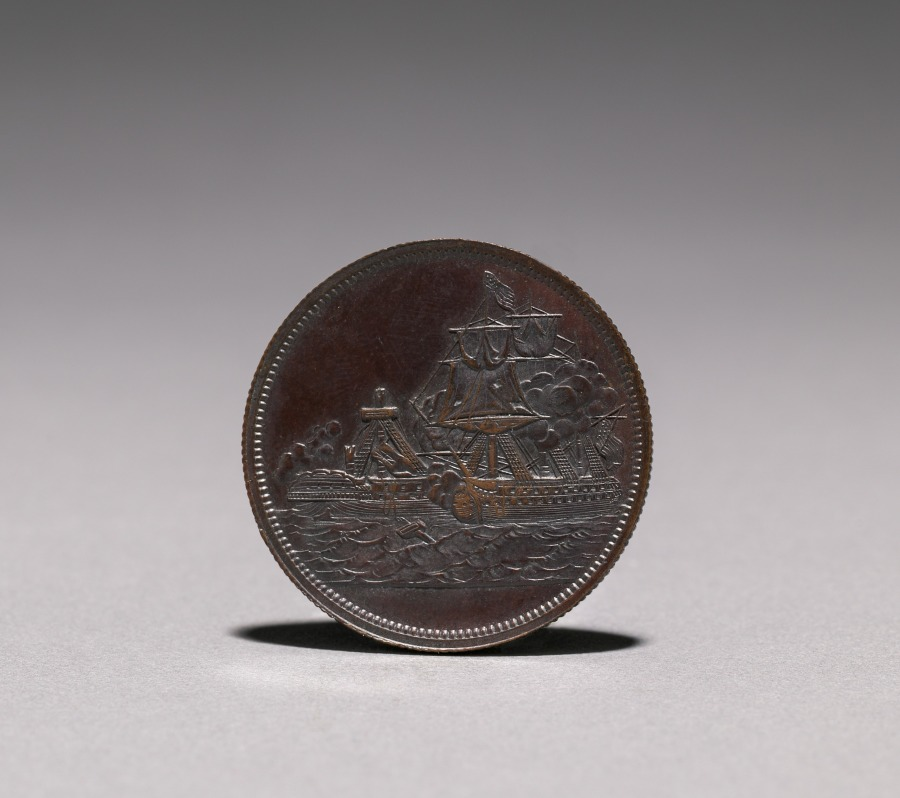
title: Medal: Constitution and Guerriere, 1812 (obverse)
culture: America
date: 1812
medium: bronze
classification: Metalwork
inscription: Constitution and Guerriere, 1812. Free Trade and sailors rights.